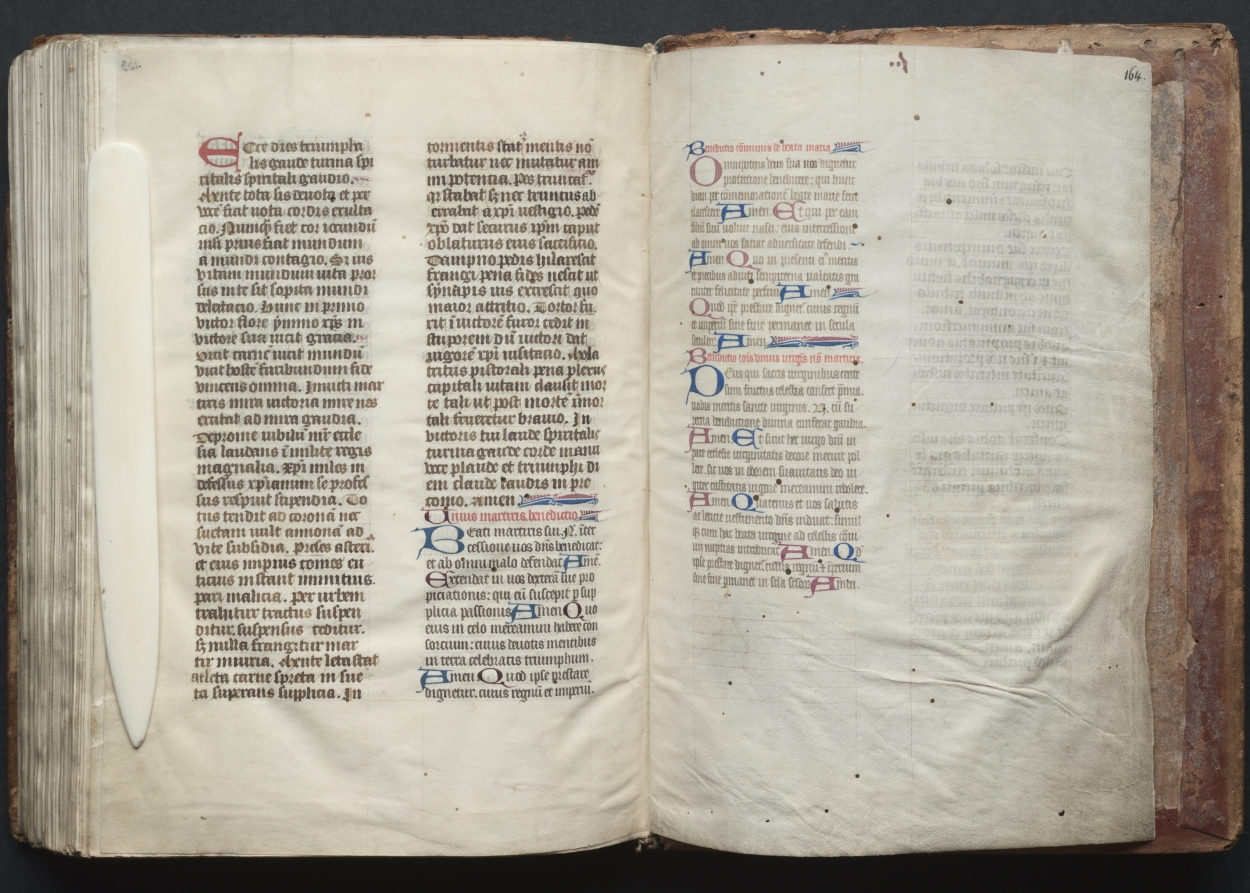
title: The Gotha Missal: Fol. 164r, Text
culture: France, Paris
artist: Master of the Boqueteaux (French)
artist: and Workshop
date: c. 1375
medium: ink, tempera, and gold on vellum; blind-tooled leather binding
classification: Bound Volume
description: The style and quality of this manuscript's decoration is typical of deluxe Parisian books made for aristocratic or royal patrons. Most of the book's decoration appears to be the work of the Master of the Boqueteaux, an artist active at the court of King Charles V (died 1380). His style was apparently shared by a number of book illuminators working in and around Paris. It is very possible that the Gotha Missal belonged to Charles V, but is not provable because the manuscript has no royal portraits and lacks a colophon. Given the book's magnificent decoration, however, it would seem that it was produced for a Valois prince, if not for the king himself. The manuscript receives its name from the German dukes of Gotha, its later owners.